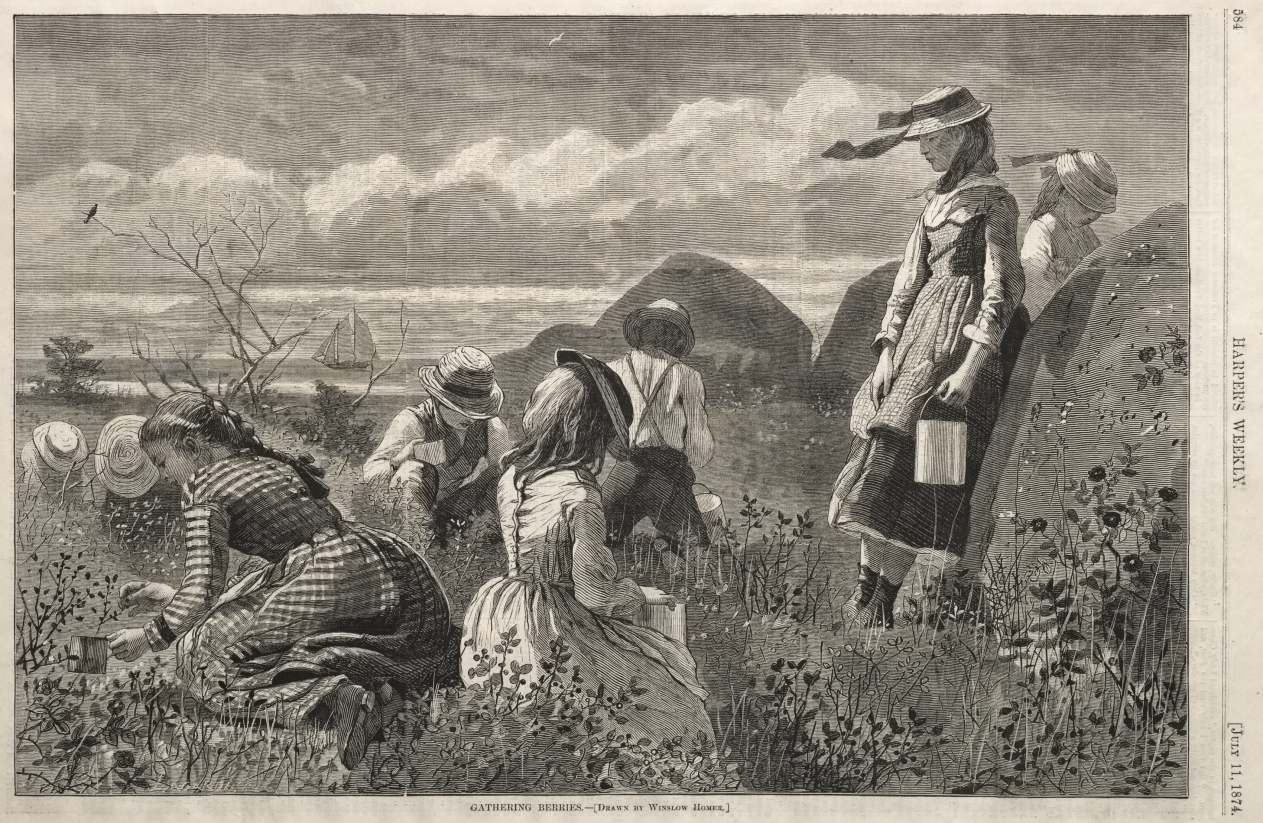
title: Gathering Berries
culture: America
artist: Winslow Homer (American, 1836–1910)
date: 1874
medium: wood engraving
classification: Print